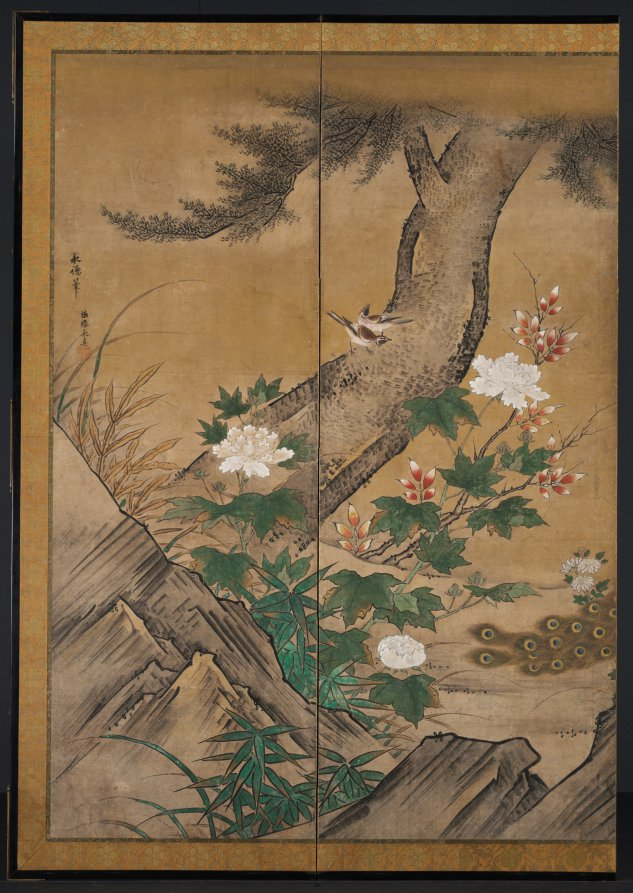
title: Birds and Flowers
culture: Japan, Momoyama period (1573–1615)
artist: attributed to Kano Mitsunobu (Japanese, 1565–1608)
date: late 1500s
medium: One of a pair of six-panel folding screens; ink, color, and gold on paper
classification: Painting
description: The landscape depicted in this pair of screens follows a seasonal progression from right to left, starting with the blossoming plum of early spring and ending with late autumn peonies. A variety of smaller birds are positioned throughout the scene, and a trio of swimming ducks is bracketed by early summer irises and early autumn bellflowers at the center. While some raptors (birds of prey) terrorize a pheasant and an egret (a waterfowl) to the right, a peacock and peahen converse to the left. Hawks are associated with military prowess, while the peafowl suggest cultural prestige.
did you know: As masters of the Kano academic painting style, both Kano Shōei and Kano Mitsunobu favored Chinese-inspired subject matter, such as birds and flowers.